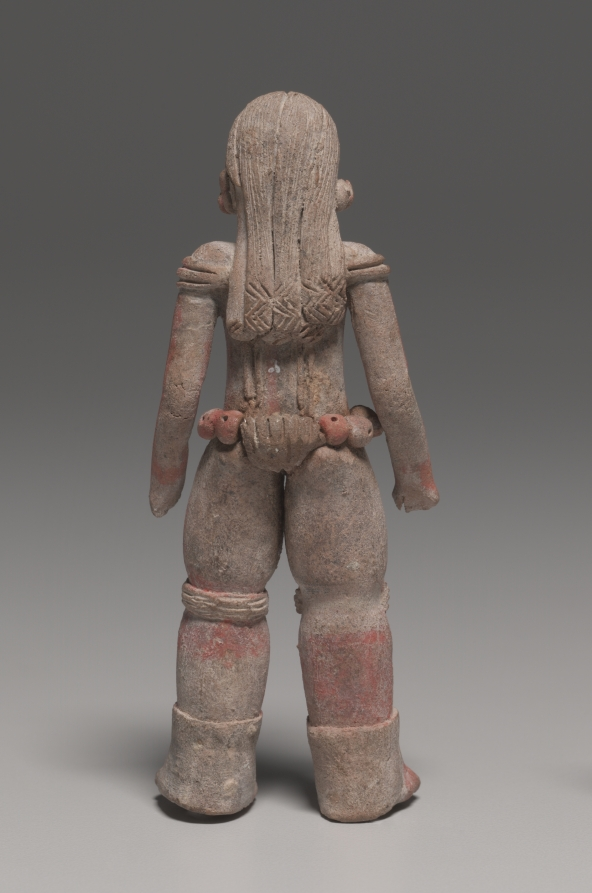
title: Female Figurine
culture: Mexico, Guerrero, Xalitla, Xochipala style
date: c. 1500–500 BCE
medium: earthenware with pigment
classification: Sculpture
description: This delicately beautiful figurine portrays an adolescent girl wearing only boots, a belt, jewelry, and cinnabar paint. The sensitive modeling of the face and body is enhanced by the meticulous detailing of applied elements such as the coiffure and belt.